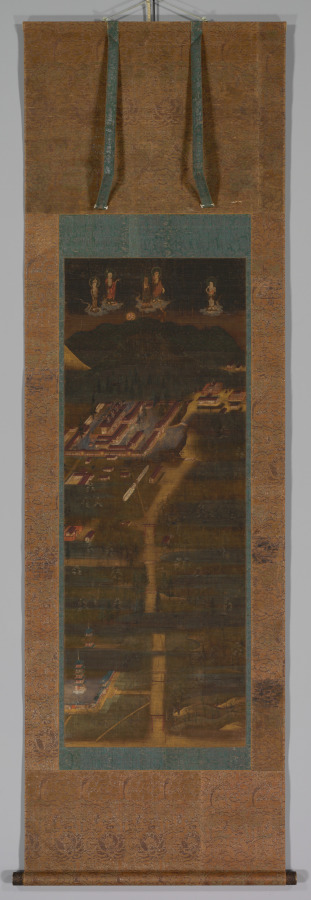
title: Kasuga Shrine Mandala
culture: Japan, Kamakura period (1185–1333)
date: early 1300s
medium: Hanging scroll; ink, color, and gold on silk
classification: Painting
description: A golden path beginning at the bottom of this painting leads up to four red-and-white buildings to the left, then to a fifth building on the right. These are the five shrine halls of Kasuga Taisha in Nara. Above and beyond the buildings is a sacred mountain range––with Mount Mikasa at center, Mount Wakakusa in gold to the left, and the sun or moon rising up behind the mountains. Sacred deer appear here and there. Five figures representing the original Buddhist forms of the five kami of the shrine complex stand on clouds above the mountains.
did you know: Sacred deer, the vehicles of the Kasuga deities, move about the shrine compound.